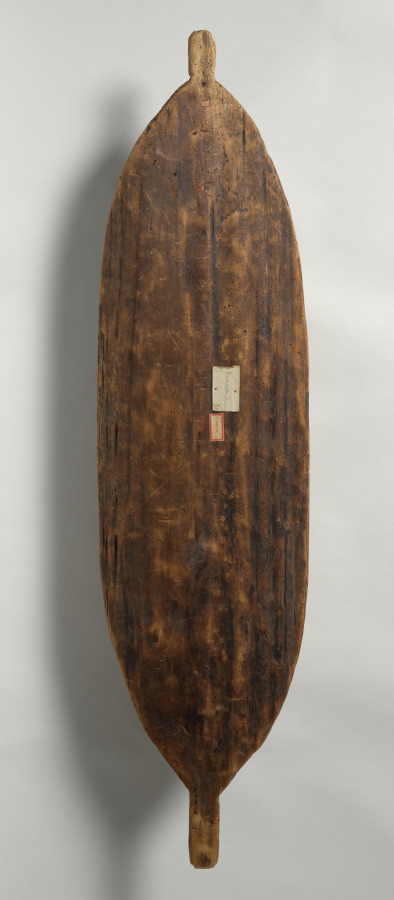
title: Spirit Board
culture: Melanesia, Papua New Guinea, Papuan Gulf, Elema District, 20th century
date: before 1930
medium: painted wood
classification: Sculpture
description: Like other sacred obejcts, spirit boards were displayed in Elema men's houses. Each board was named after the bush spirit who inhabited it.